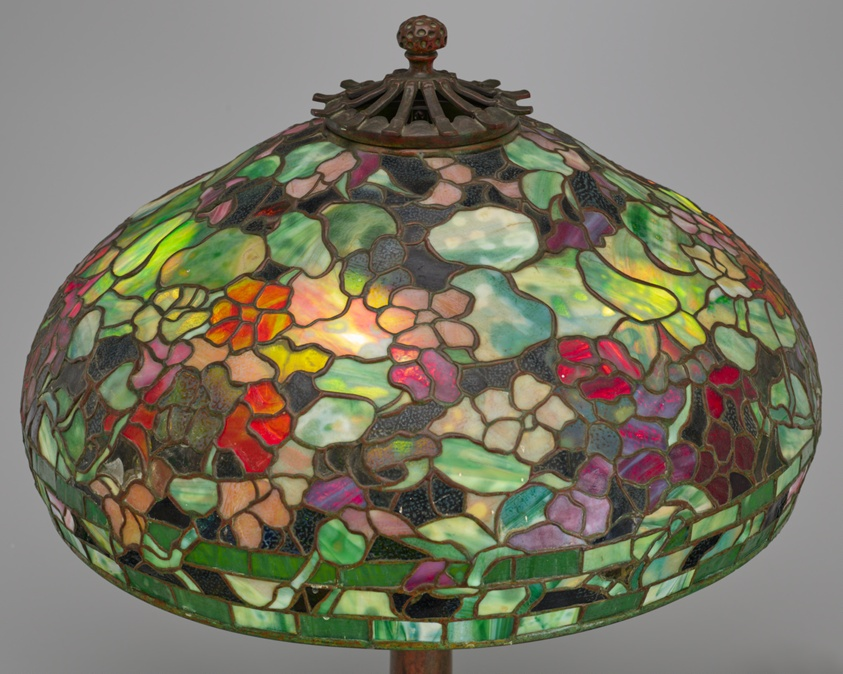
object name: Furnishings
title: Lamp with “Nasturtium” Shade and “Bamboo” Base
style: Arts and Crafts Movement, 20th Century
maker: Design attributed to Clara Pierce Wolcott Driscoll (American, 1861–1944); Tiffany Studios (American, 1902–32); Corona, New York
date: c. 1910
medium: Favrile glass and bronze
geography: Corona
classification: lamp (lighting device); american decorative arts; decorative arts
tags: Nasturtium, bamboo